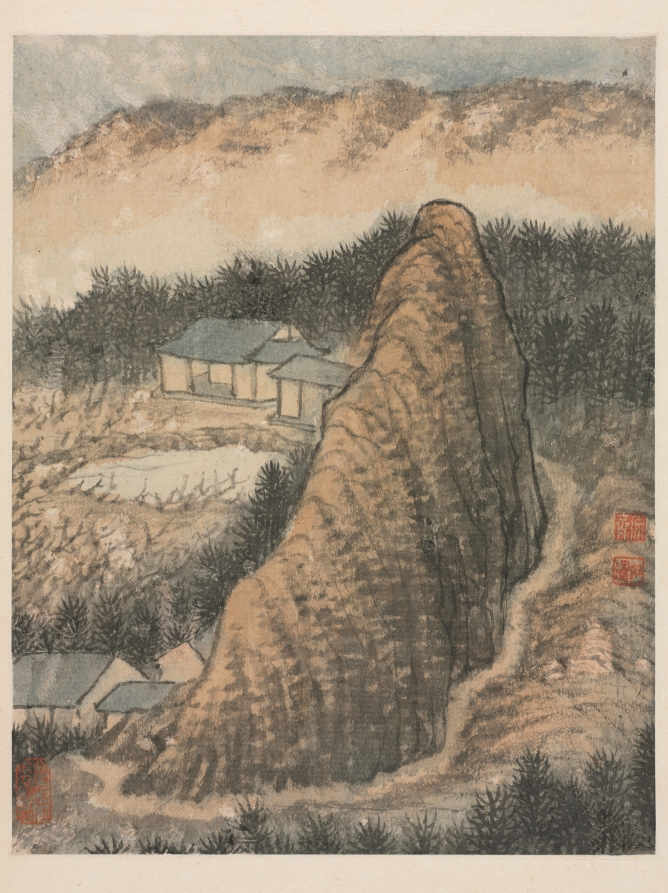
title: Reminiscences of Qinhuai River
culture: China, Qing dynasty (1644-1911)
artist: Shitao (Chinese, 1642–1707)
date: 1642–1707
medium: album leaf, ink and color on Song paper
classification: Painting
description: Shitao’s skillfully rendered composition suggests a sweeping movement from the base of the central rising mass, silhouette of forest, and a bright bend of misty atmosphere under the distant hills, to form almost a continual circle of energy—a gentle vortex. That is a perfect embodiment of the early Qing ideal of a momentous flow, with suggestion of the subterranean veins and linkages.